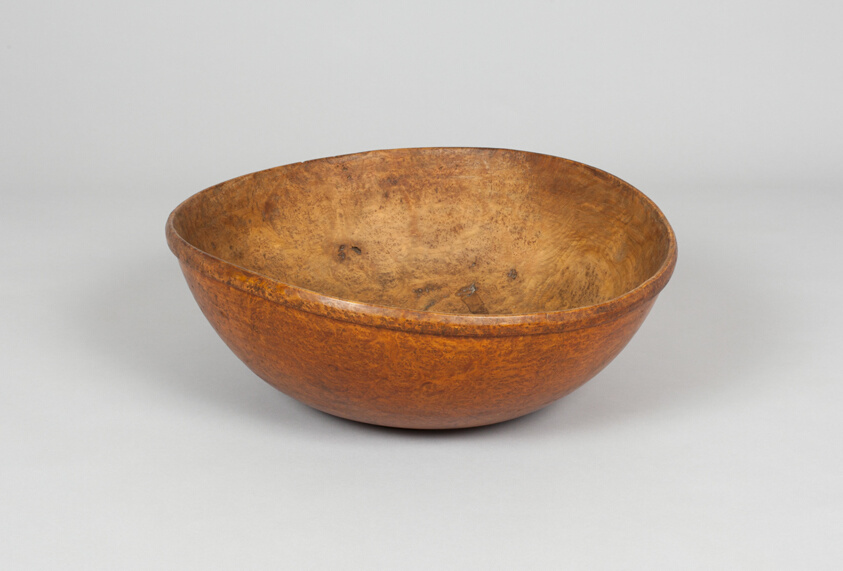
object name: Decorative Arts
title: Bowl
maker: Artist unknown (American, 19th century); New England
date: 1800–60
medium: Maple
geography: New England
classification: bowl; wood; american decorative arts; american arts; decorative arts